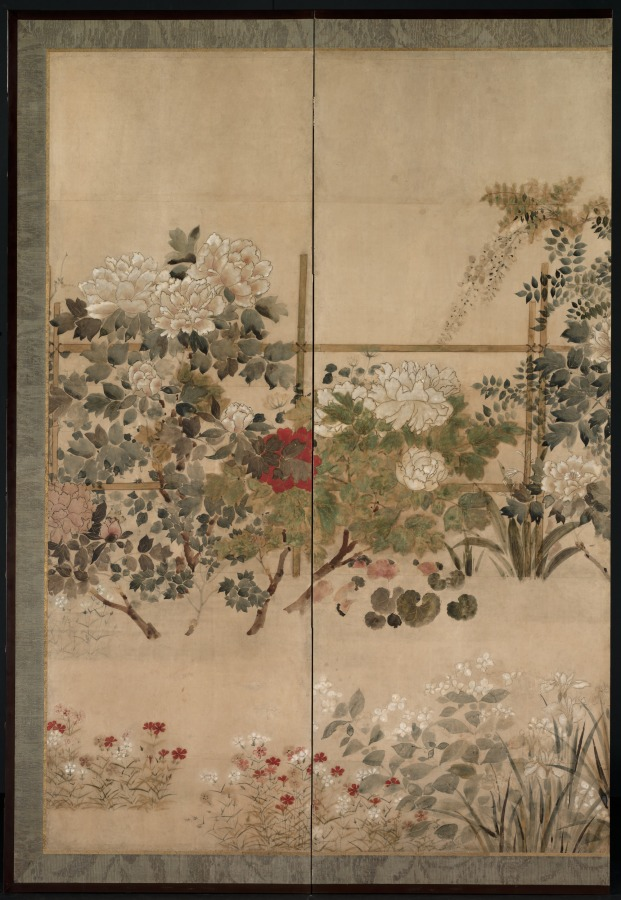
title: Flowers and Grasses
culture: Japan, Edo period (1615–1868)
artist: Kitagawa Sōsetsu (Japanese, active 1639–50)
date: mid-1600s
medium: One of a pair of six-panel folding screens; ink and color on paper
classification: Painting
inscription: two seals, lower right: "I-nen; Sosetsu"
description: Kitagawa Sōsetsu painted for the Maeda family, powerful rulers of what is present-day Ishikawa Prefecture on the central northern coast of Honshū, Japan’s main island. Screens served as room dividers and backdrops in Maeda grand residences. This composition is considered one of the artist’s masterpieces. Kitagawa Sōsetsu is thought to have been a student of Tawaraya Sōsetsu, who was in turn the student of Tawaraya Sōtatsu, the Kyoto-based master painter regarded as the creator of the style that came to be known as Rinpa. By selecting a painter of this lineage, the Maeda family consciously connected their aesthetics to those of the imperial capital as a means of proclaiming their elevated status.